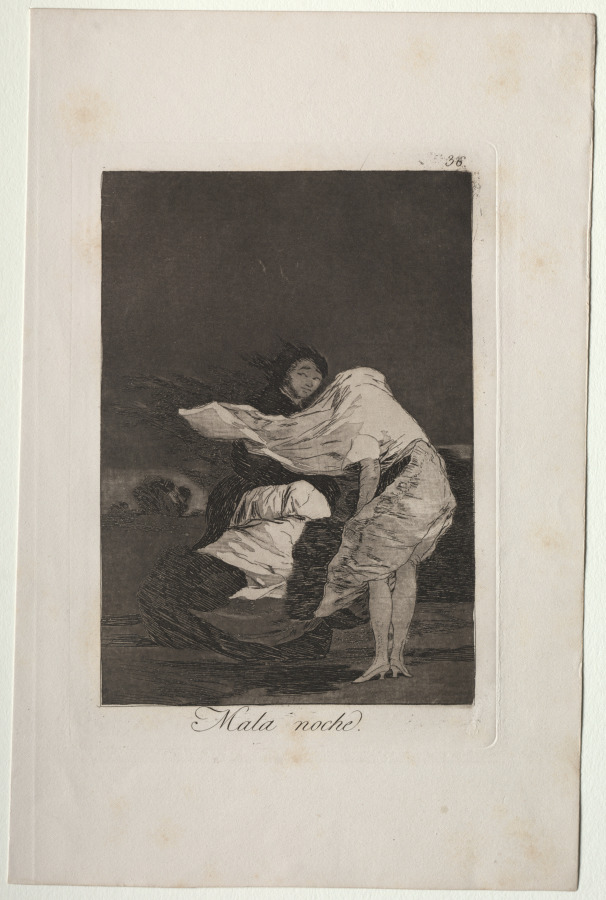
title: A Bad Night, Plate 36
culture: Spain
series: Los Caprichos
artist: Francisco de Goya (Spanish, 1746–1828)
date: 1799 (printed c.1855)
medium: etching and aquatint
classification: Print